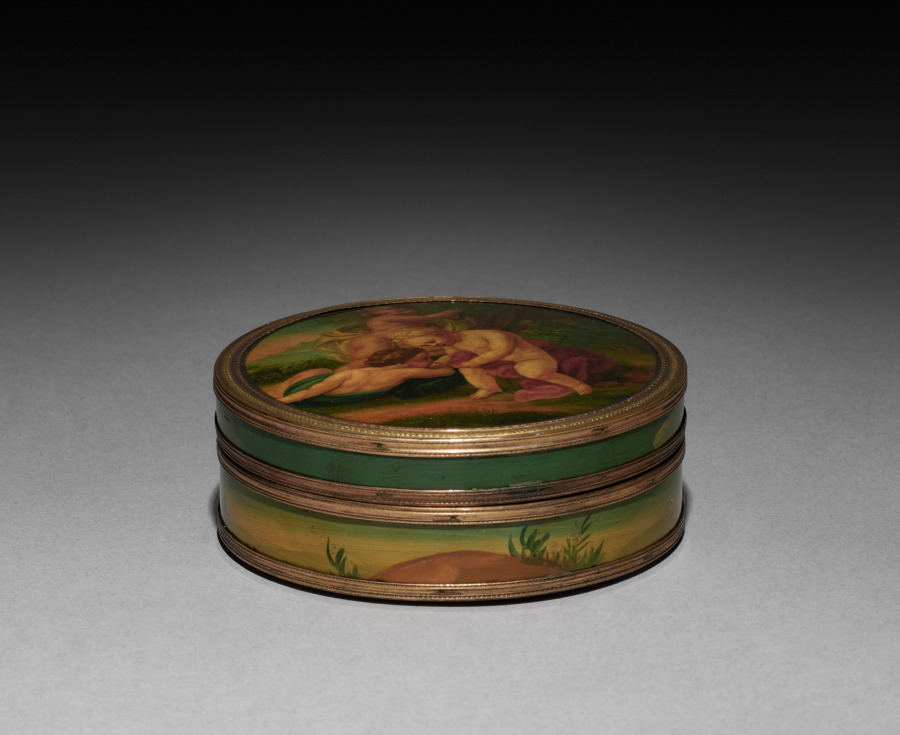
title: Box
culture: France, 18th century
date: 1700s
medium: lacquer with tortoiseshell lining, gilt metal mounts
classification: Miscellaneous